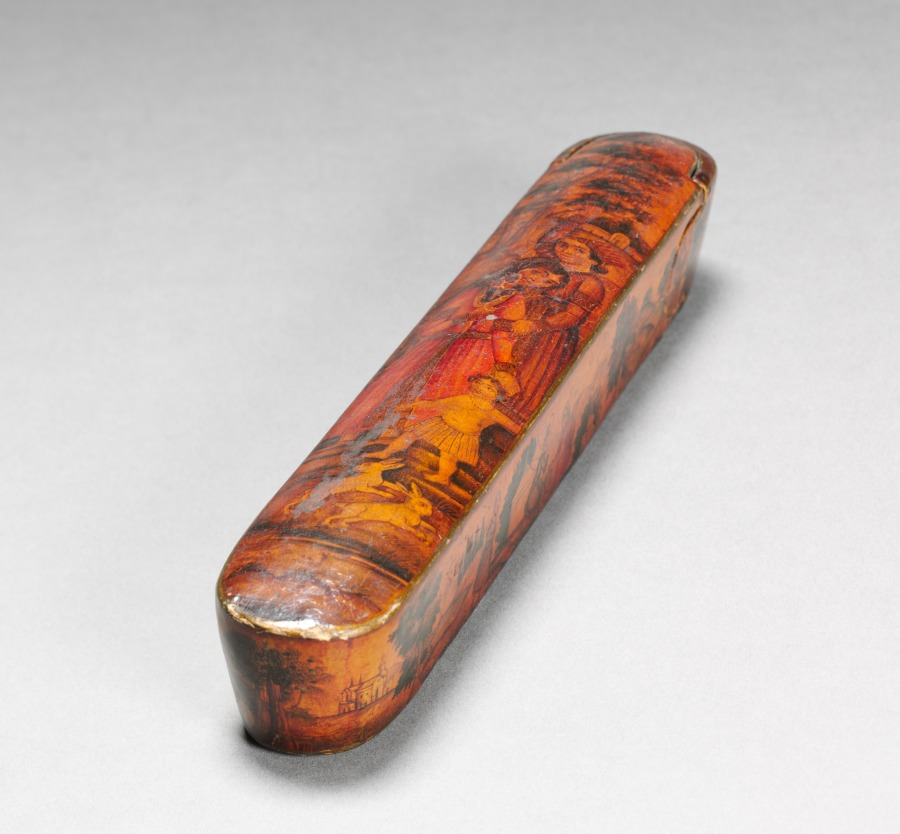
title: Pen and Ink Box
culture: Iran, Qajar period (1779-1925)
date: 1800s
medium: lacquer over papier maché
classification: Lacquer